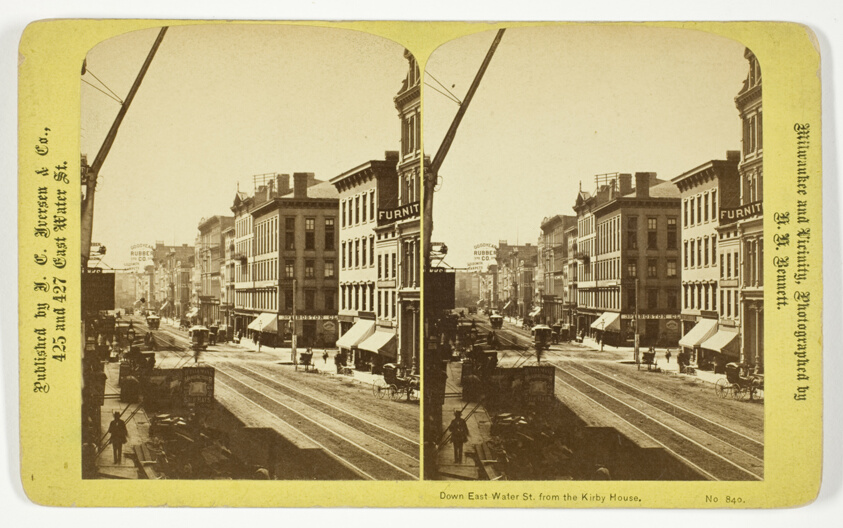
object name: Photograph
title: Down East Water St. from the Kirby House, No.840 from the series "Milwaukee and Vicinity"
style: 19th century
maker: Henry Hamilton Bennett (American, born Canada, 1843-1908)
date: 1880/89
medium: Albumen print, stereo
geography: United States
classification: photography; photograph; albumen silver print; stereograph (albumen)